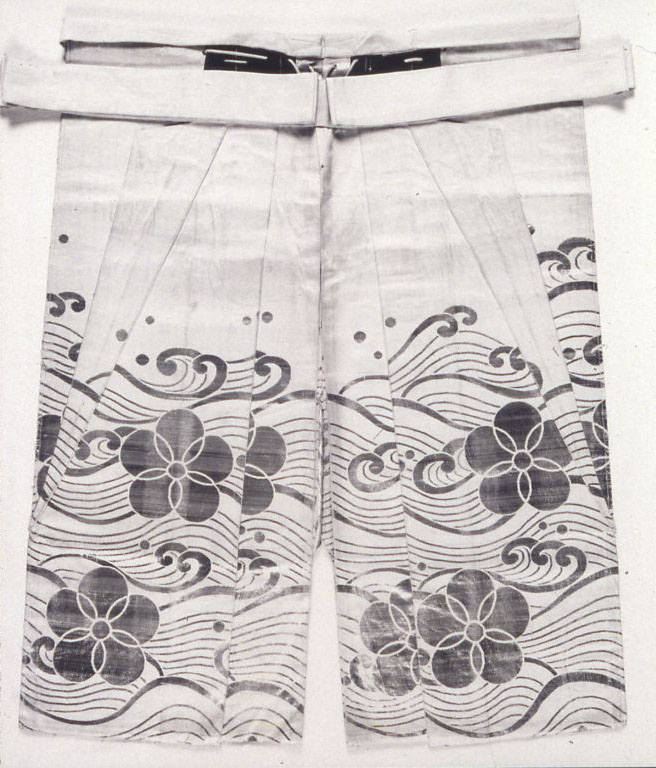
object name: Textile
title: Hangiri (Noh Costume)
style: late edo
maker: Japan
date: 1801/25, late Edo period (1789–1868)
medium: Silk and gold-leaf-over-lacquered-paper strips, warp-float faced 7:1 satin weave with plain interlacings of secondary binding warps and supplementary patterning wefts; back stiffened with reeds, plain weave; covered with paper; lined with silk, plain weave; ties: silk, plain weave; braided cords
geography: Japan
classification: textile; costume - weaving; costume; kimonos